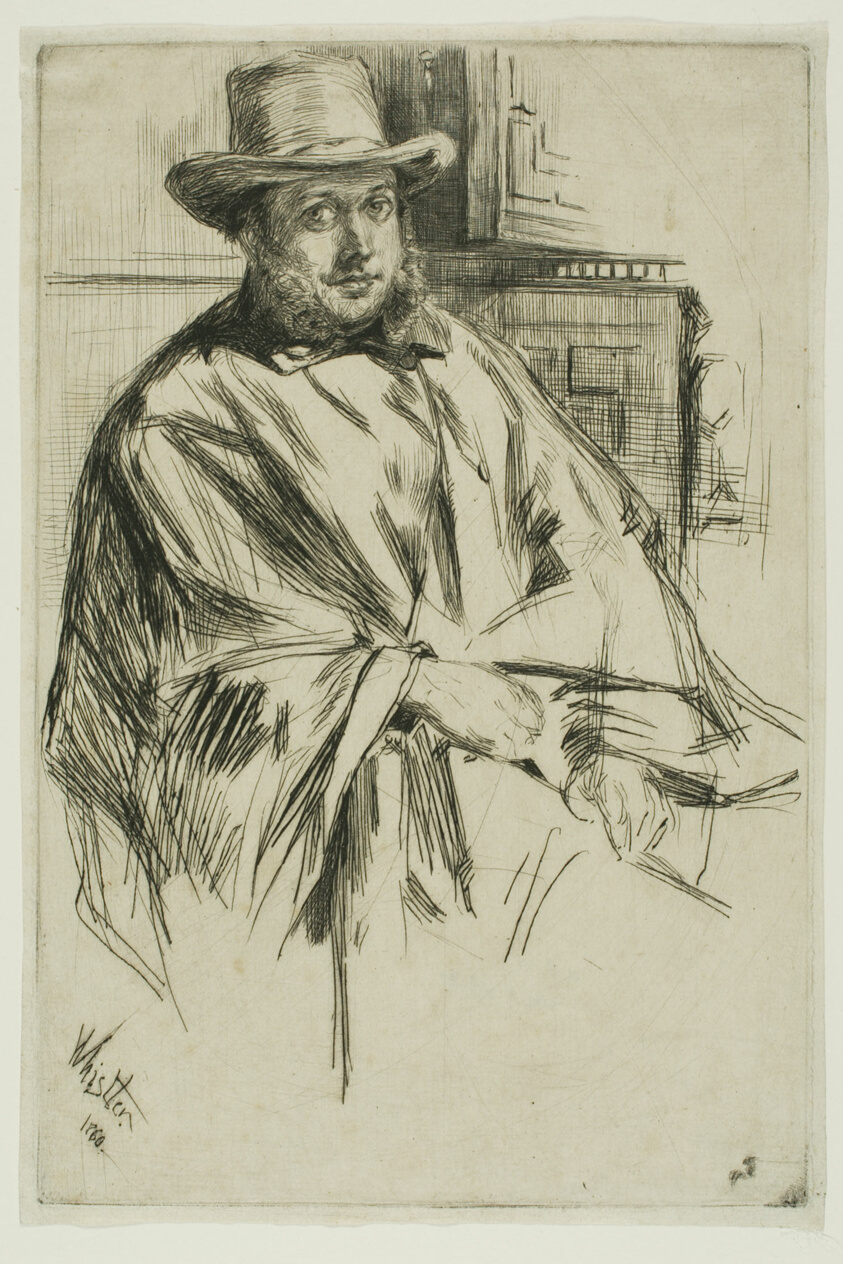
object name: Print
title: Portrait of a man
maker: James McNeill Whistler (American, 1834-1903)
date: 1860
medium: Drypoint in black ink on ivory Japanese paper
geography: United States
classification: drypoint; print; prints and drawing; paper